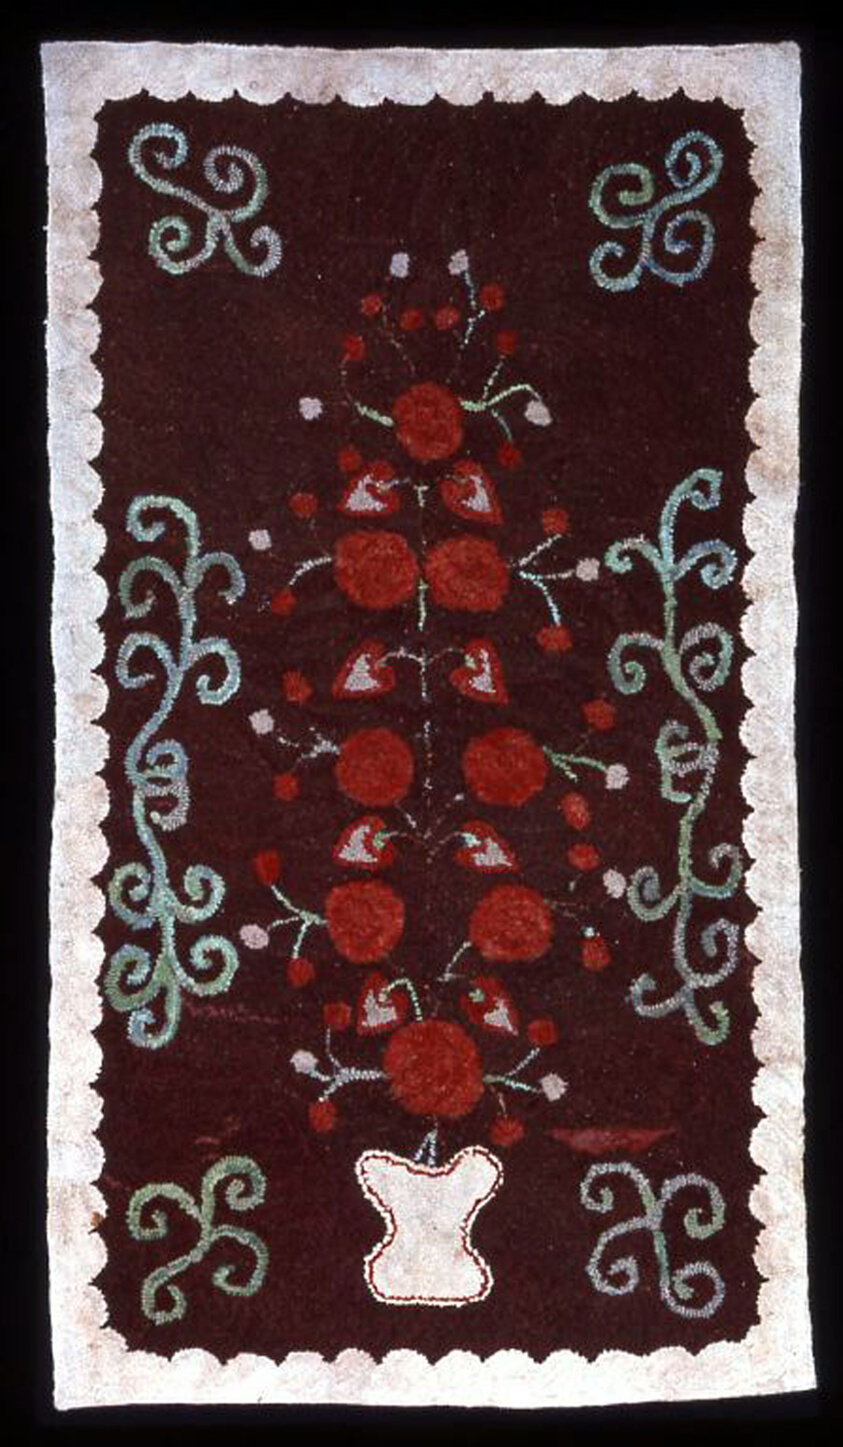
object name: Textile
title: Rug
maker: United States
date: 19th century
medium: Variety of fibers, plain weave with variety of fibers, yarns, felted, knitted, oblique interlaced and/or woven strips, forming "hooked" pile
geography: United States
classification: textile; needlework - rug